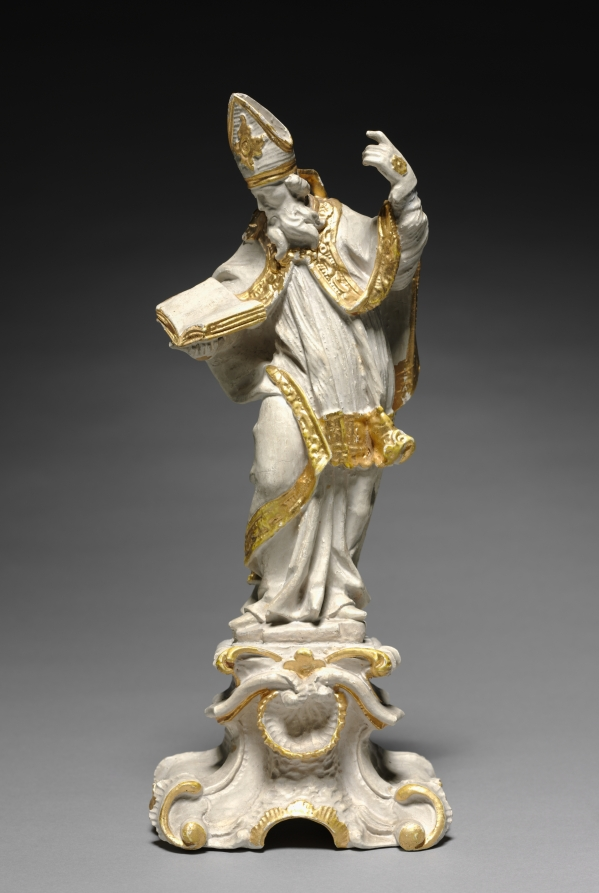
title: Bishop Saint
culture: Germany, 18th century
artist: attributed to Ferdinand Tietz (Austrian, 1708–1777)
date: c. 1740–1750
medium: painted and gilded wood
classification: Sculpture